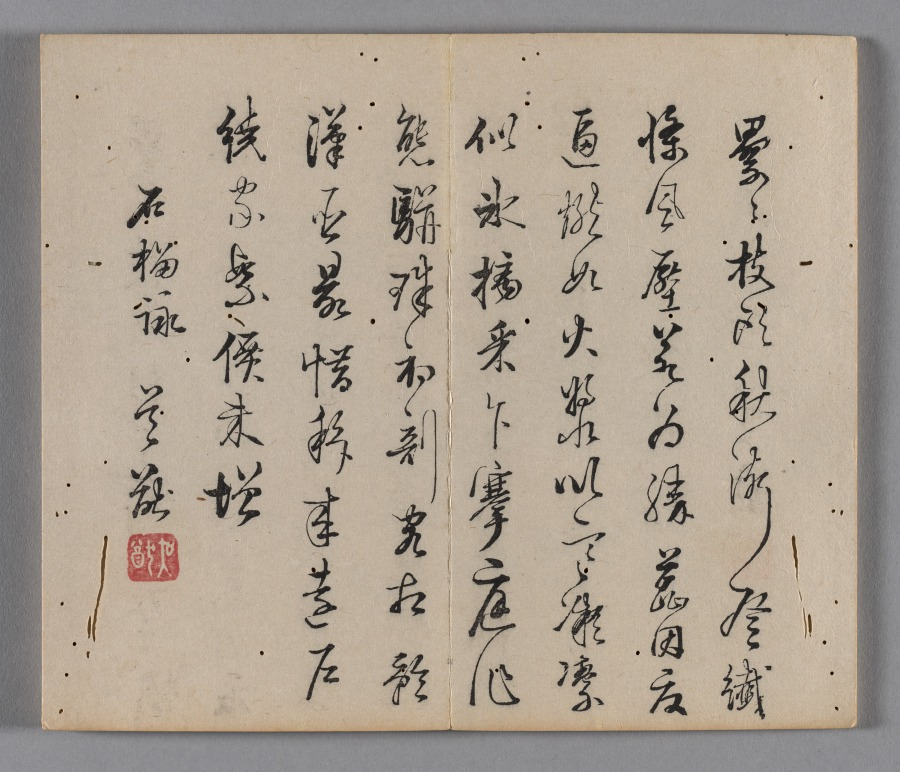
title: Ten Bamboo Studio Painting and Calligraphy Handbook (Shizhuzhai shuhua pu): Fruit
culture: China, Qing dynasty (1644-1911)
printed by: Hu Zhengyan (Chinese, c. 1584–1674)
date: 1633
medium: Woodblock-printed book; ink and colors on paper; first edition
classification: Print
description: Color printing reached a level of perfection in the early 1600s, as seen in this Ten Bamboo Studio Collection of Calligraphy and Painting and the Mustard Seed Garden Manual of Painting (printed 1679 and 1701). The painterly quality, precision in registering (aligning) the woodblocks, and harmonious colors made them the most successful color print editions in Chinese history. Both editions were printed and compiled in Nanjing, spread nationwide, and had a great impact on the arts in Japan and Korea.